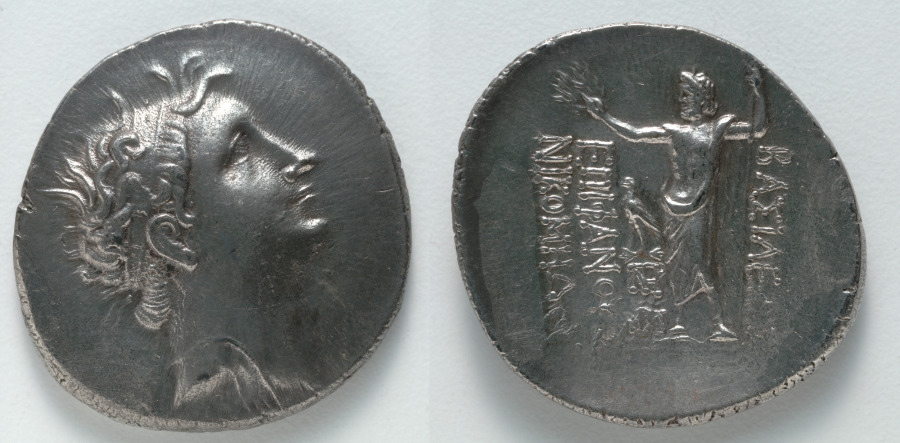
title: Tetradrachm: Head of Nicomedes II (obverse); Zeus (reverse)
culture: Greek, Bithynian, minted in Bithynia, reign of Nicomedes II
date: 149–120 BCE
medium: silver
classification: Coins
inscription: ΒΑΣΙΛΕΩΣ | ΕΠΙΦΑΝΟΥΣ | ΝΙΚΟΜΗΔΟΥ